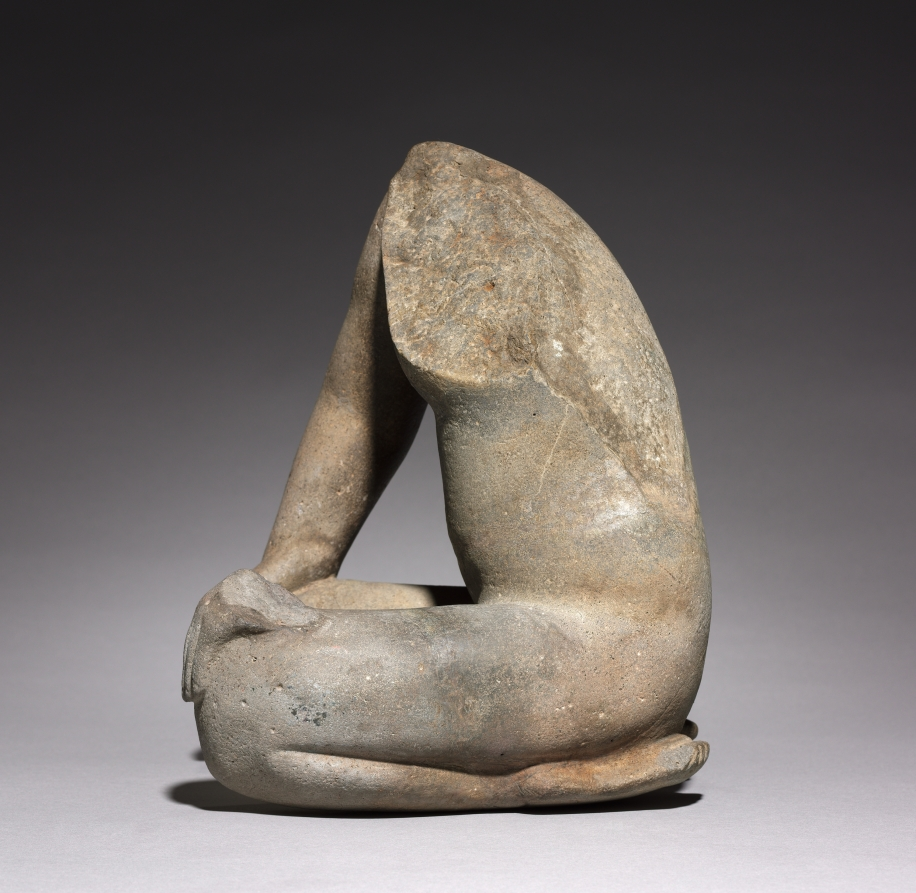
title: Kneeling Figure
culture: Mexico, Guerrero, Olmec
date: c. 1200–600 BCE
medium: stone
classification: Sculpture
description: Outside of the Maya, Olmec sculptures of humans have a naturalism unknown in other Mesoamerican artistic traditions. On this finely carved figure, the musculature of the arms, torso, and legs is carefully depicted, and even the fingernails and toenails and are shown.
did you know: An observant traveler discovered the left knee and hand fragment, orginally missing and now reunited.